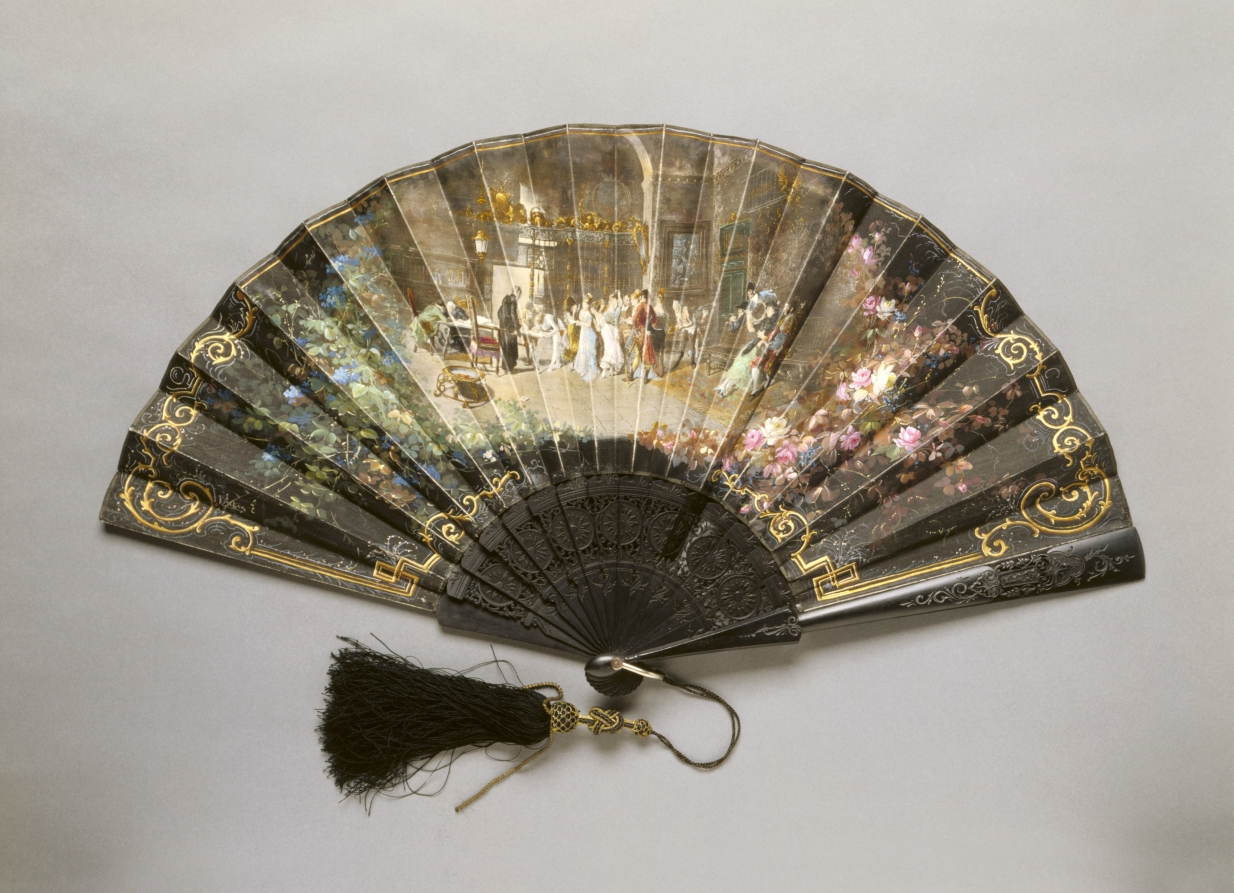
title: Fan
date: before 1915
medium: wood, metal threads, silk, pigment on silk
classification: Miscellaneous